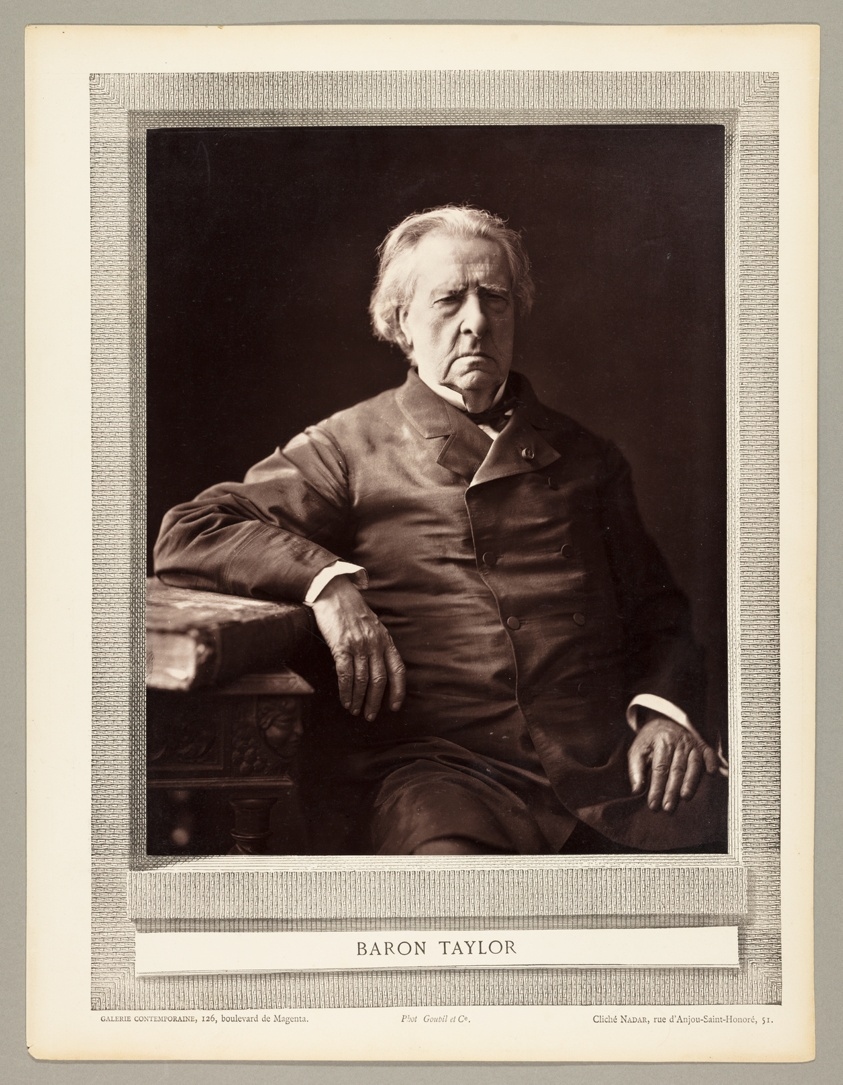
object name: Photograph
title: Baron Isidore Justin Séverin Taylor (Belgian playwright and travel writer, 1789-1878)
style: 19th century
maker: Nadar (Gaspard Félix Tournachon) (French, 1820–1910)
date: 1872/75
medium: Woodburytype, from the periodical “Galerie Contemporaine Littéraire, Artistique” (1877), volume 4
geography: France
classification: woodburytype; photomechanical process; photography; photograph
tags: Collected by Hugh Edwards, Contemporaine Littéraire